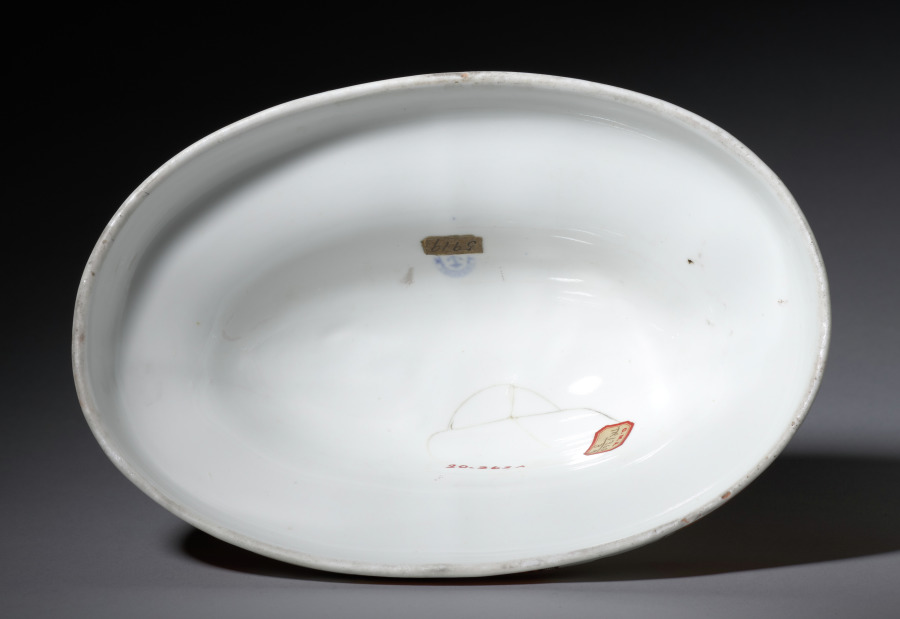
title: Vegetable Dish (lid)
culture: England, Staffordshire, early 19th century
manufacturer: Davenport Pottery and Porcelain Factory (British)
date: early 1800s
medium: ceramic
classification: Ceramic